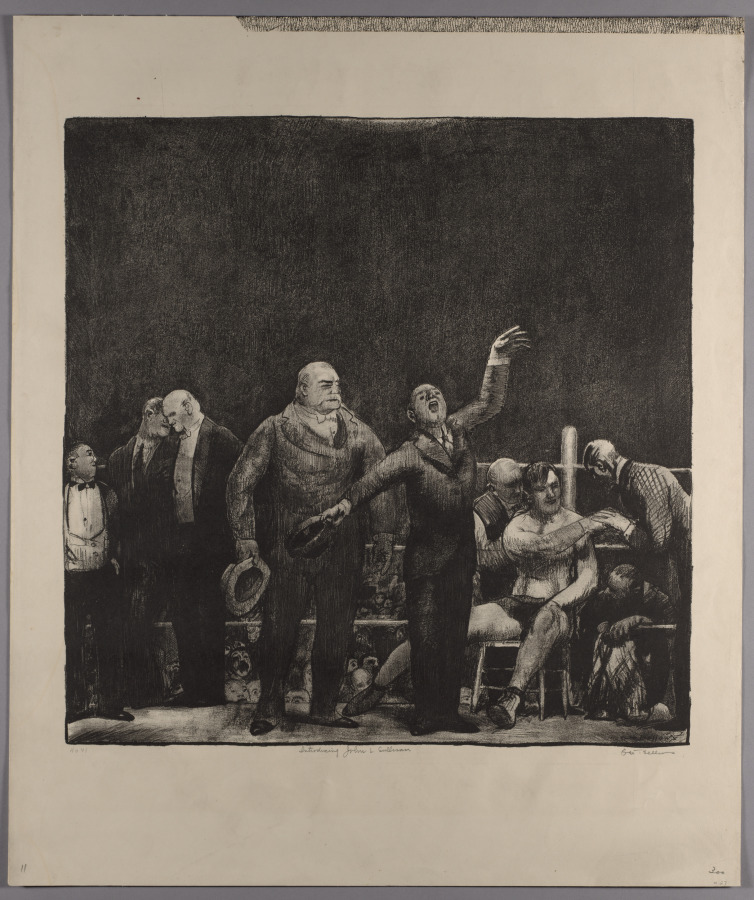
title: Introducing John L. Sullivan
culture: America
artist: George Bellows (American, 1882–1925)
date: 1916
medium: lithograph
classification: Print